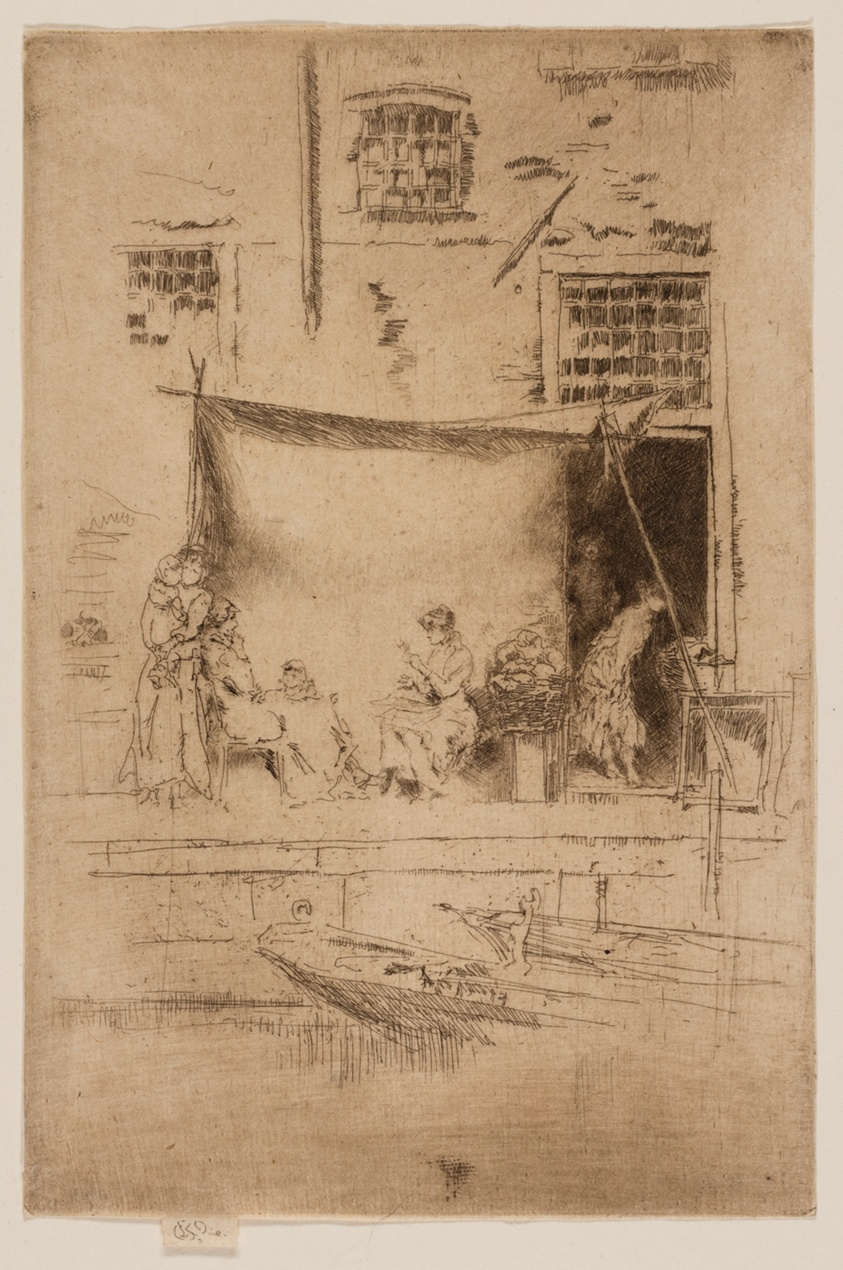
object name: Print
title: Fruit Stall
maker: James McNeill Whistler (American, 1834-1903)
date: 1879/80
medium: Etching and drypoint with foul biting in dark brown ink on ivory laid paper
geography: United States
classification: etching; drypoint; foul biting; print; prints and drawing; paper